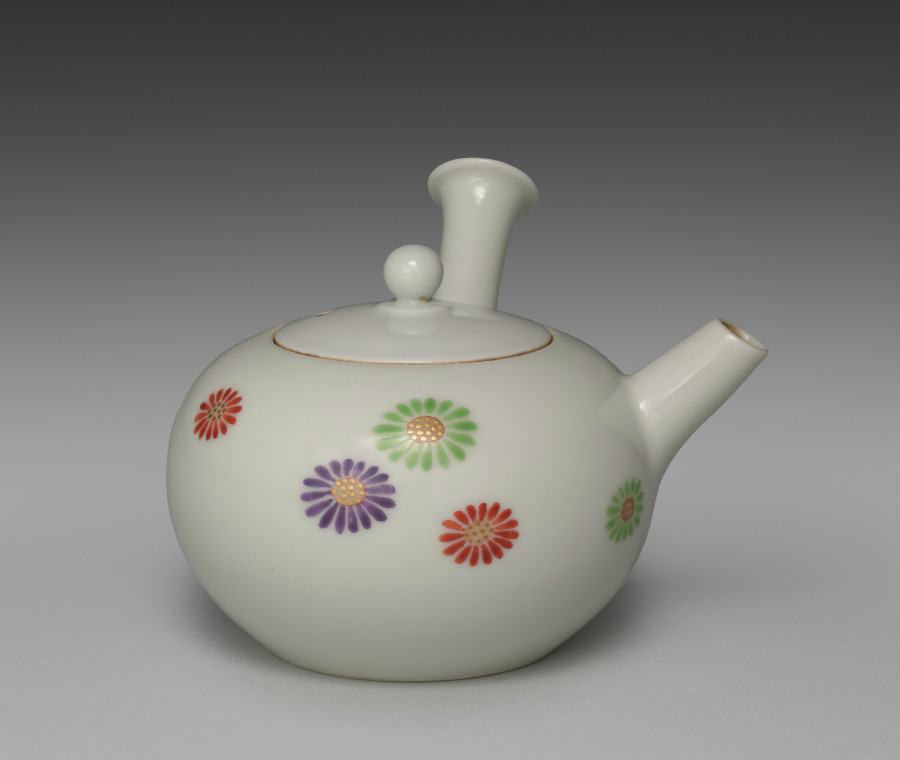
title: Teapot with Chrysanthemum Motifs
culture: Japan, Meiji period (1868–1912)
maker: Seifū Yohei III (Japanese, 1851–1914)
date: 1912–14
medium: Porcelain with overglaze color enamel and gold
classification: Ceramic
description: This side-handled sencha teapot has the lid flush against the body, forming an oblong orb. It is decorated with a sprinkling of similar chrysanthemum motifs in red, green, and purple overglaze color enamels with centers of pale red dotted with gold.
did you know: This teapot with chrysanthemum motifs shows off Seifū Yohei III’s technique of enamels painted over the glaze.